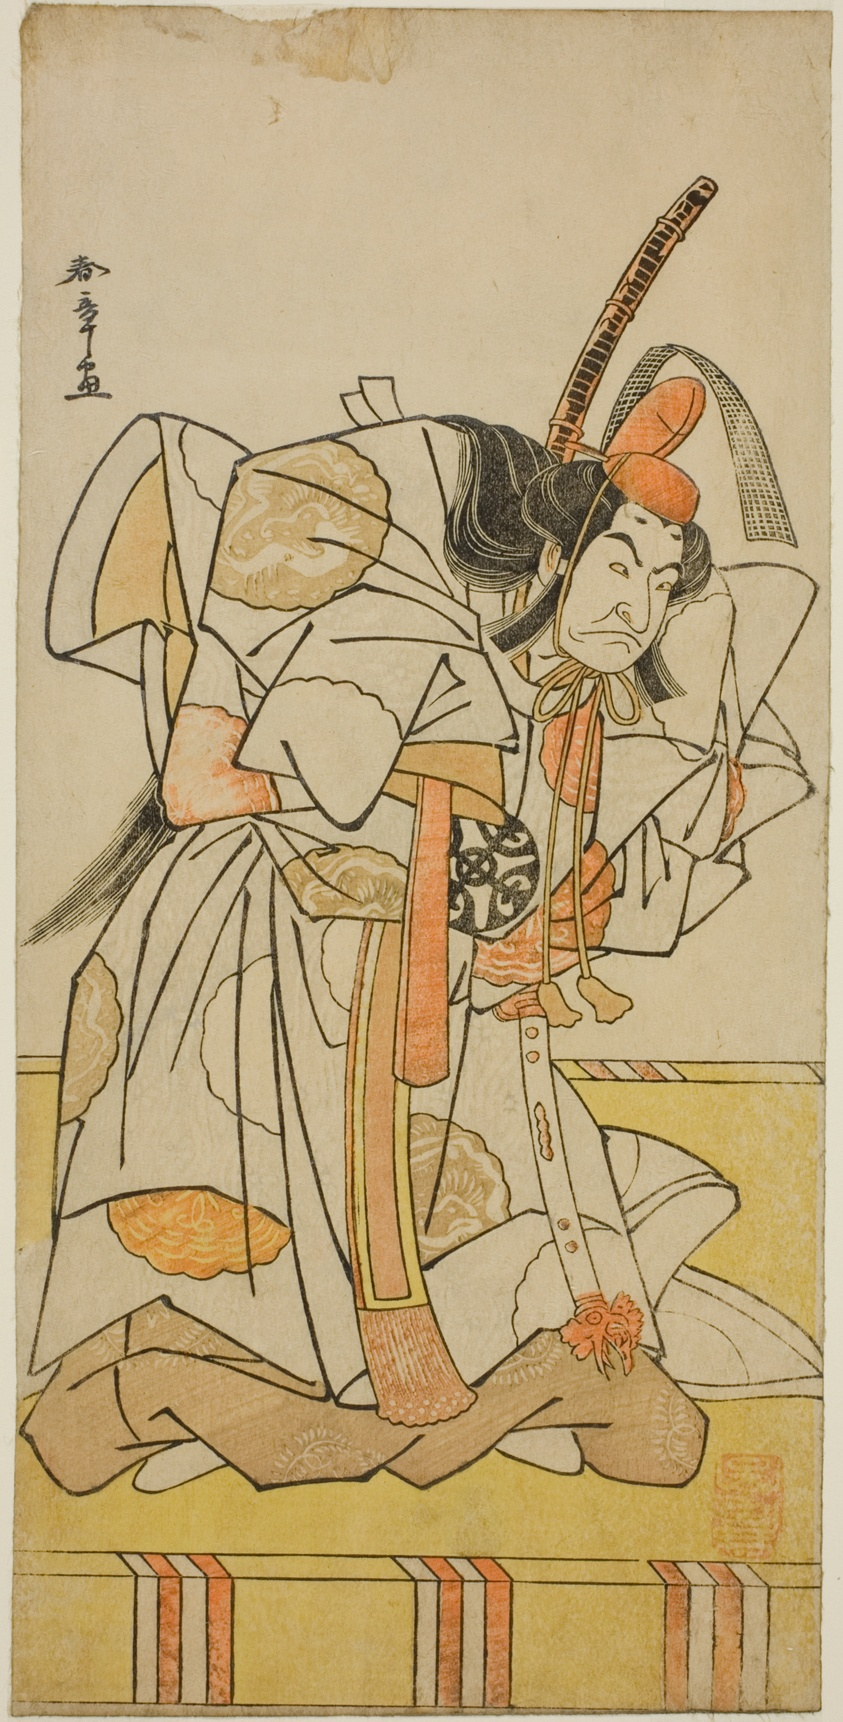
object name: Print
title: The Actor Nakamura Nakazo I as Prince Takahiro in the Play Date Nishiki Tsui no Yumitori, Performed at the Morita Theater in the Eleventh Month, 1778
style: Japanese (culture or style)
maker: Katsukawa Shunsho 勝川 春章; Japanese, 1726-1792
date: c. 1778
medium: Color woodblock print; hosoban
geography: Japan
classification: woodblock print; print; asian art